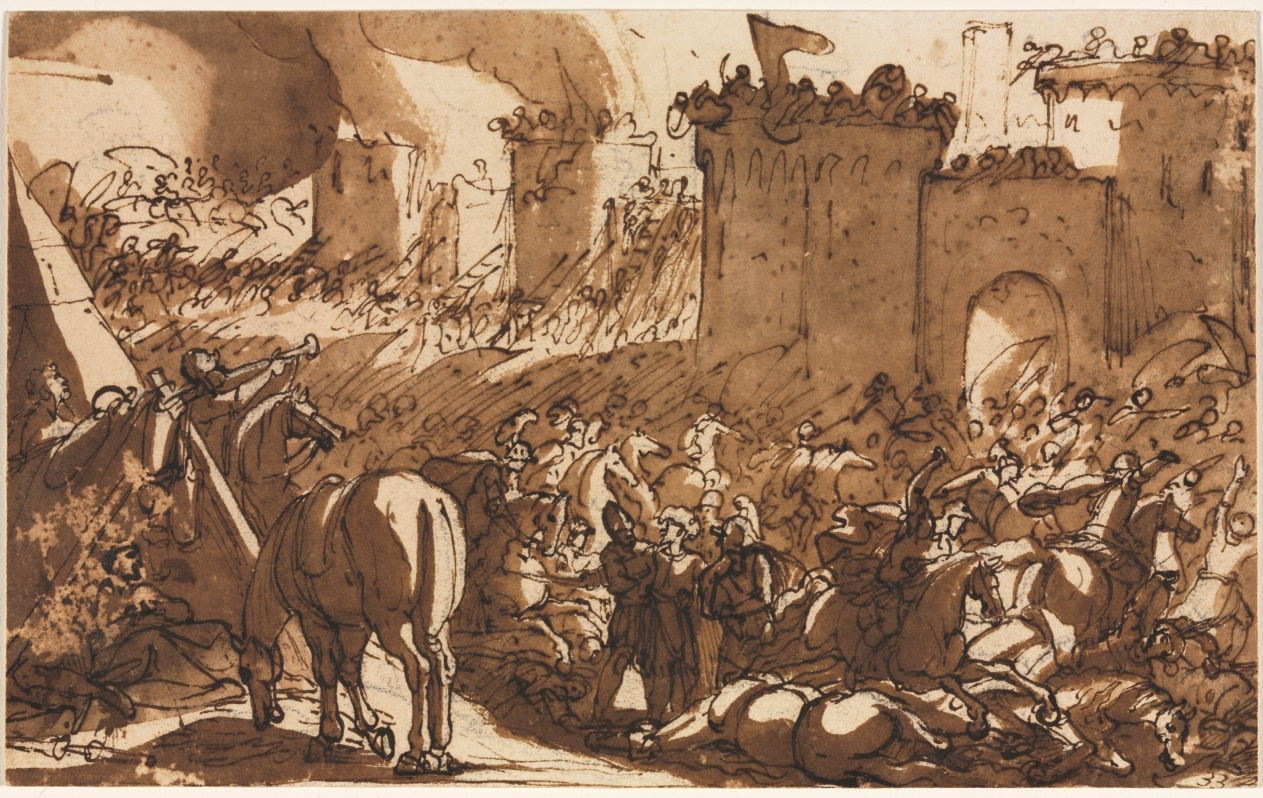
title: Battle Scene with a Fort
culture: Italy, 17th century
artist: Antonio Tempesta (Italian, 1555–1630)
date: 1617–30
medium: pen and brown ink and brush and brown wash, over black chalk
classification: Drawing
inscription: lower right, in brown ink: 33 ; VERSO, lower center, in graphite: A 3539